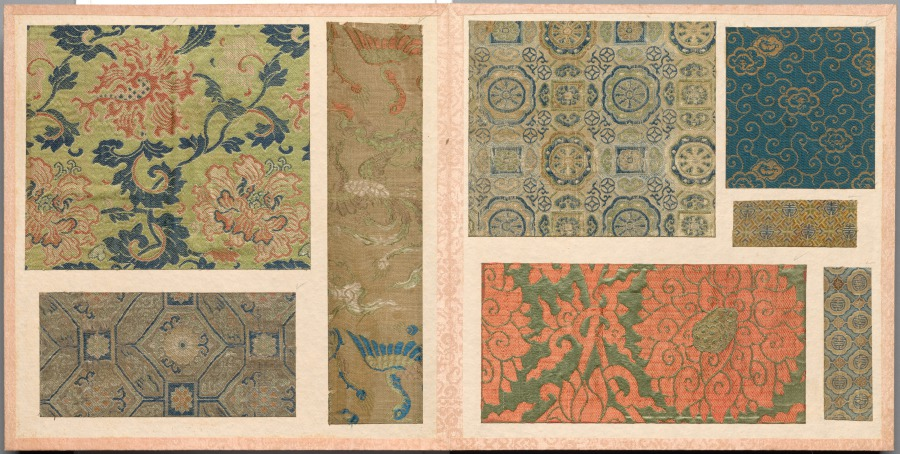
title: Album of Textile Samples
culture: Japan and China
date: 1700s–1800s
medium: silk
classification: Textile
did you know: This album contains 46 pages with 156 mounted Chinese or Japanese textile samples.